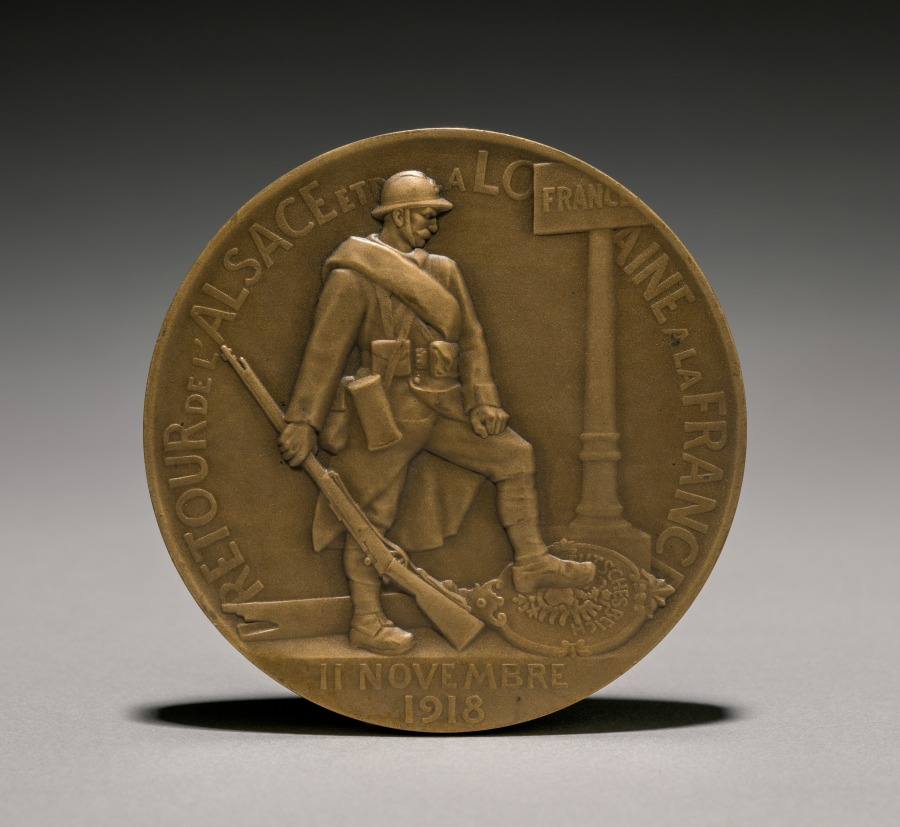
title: Medal (reverse)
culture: France, 20th century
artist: Paul Roger-Bloche (French)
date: 1900s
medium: bronze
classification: Metalwork